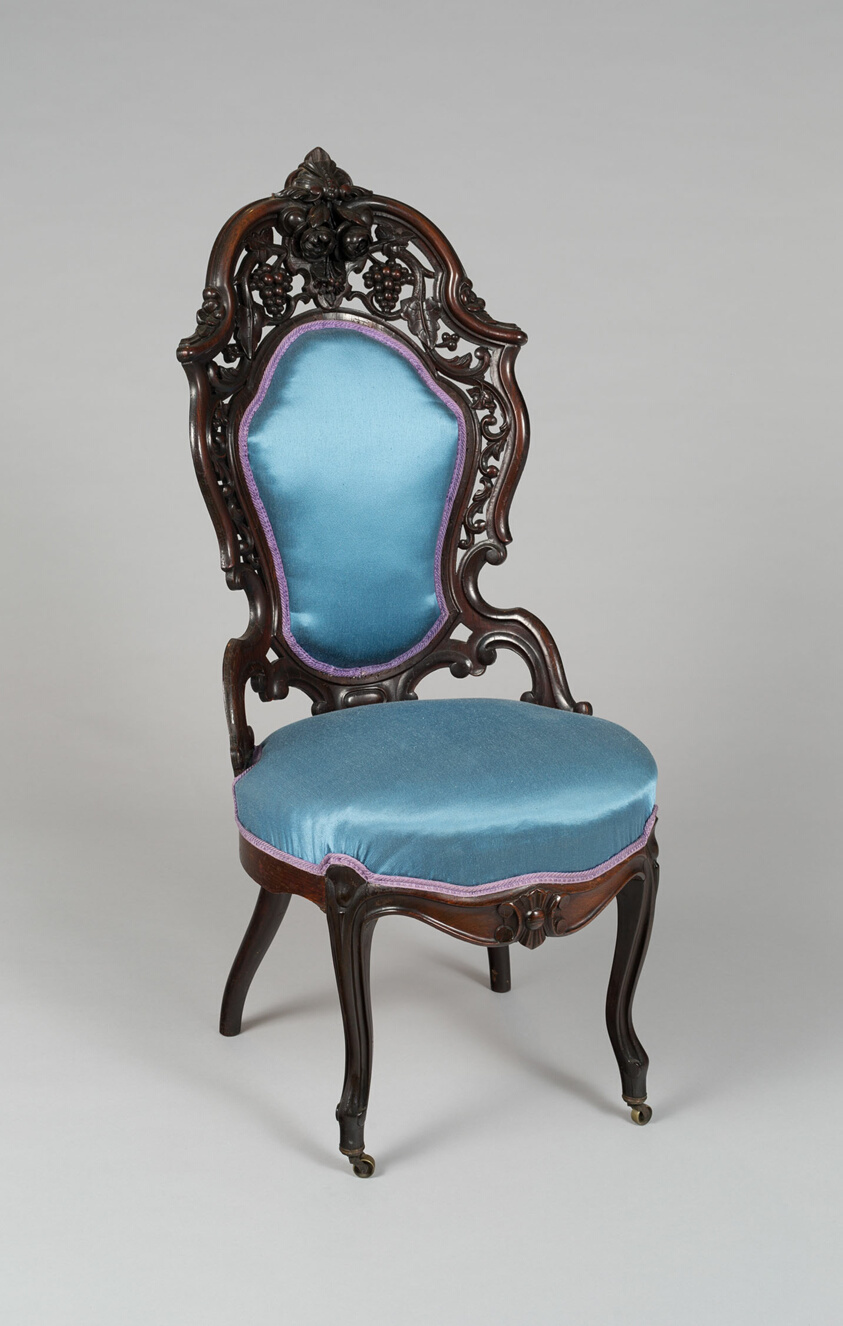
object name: Furniture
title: Side Chair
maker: John and Joseph W. Meeks Company; American, active 1836–59; New York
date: 1856–65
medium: Rosewood and upholstery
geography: New York City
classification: seating; furniture; american decorative arts; american arts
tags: furniture